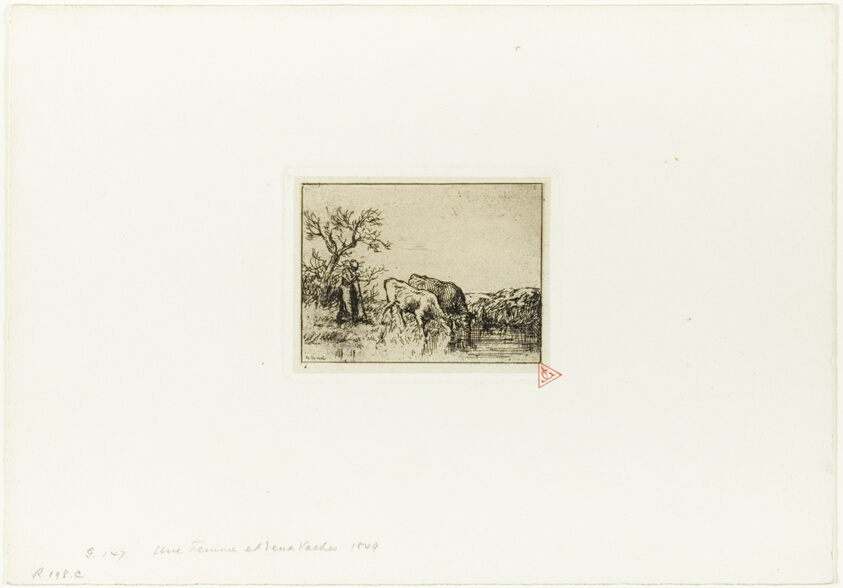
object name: Print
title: Woman Tending Two Cows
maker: Charles Émile Jacque (French, 1813-1894)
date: 1848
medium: Etching on cream China paper laid down on ivory wove paper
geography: France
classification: etching; print; prints and drawing